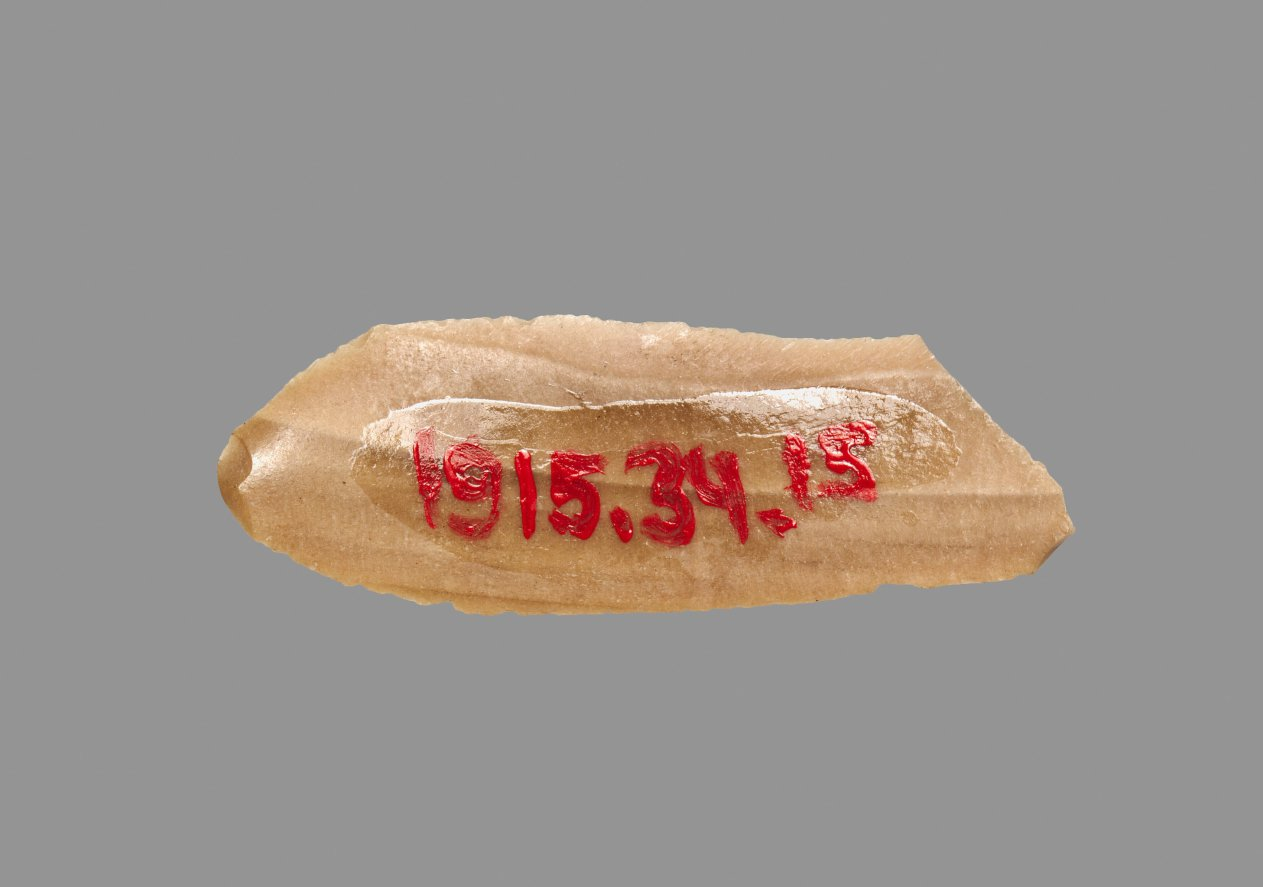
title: Sickle Blade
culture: Egypt, Middle Kingdom (2040–1648 BCE), Dynasty 12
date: 1980–1801 BCE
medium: flint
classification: Implements